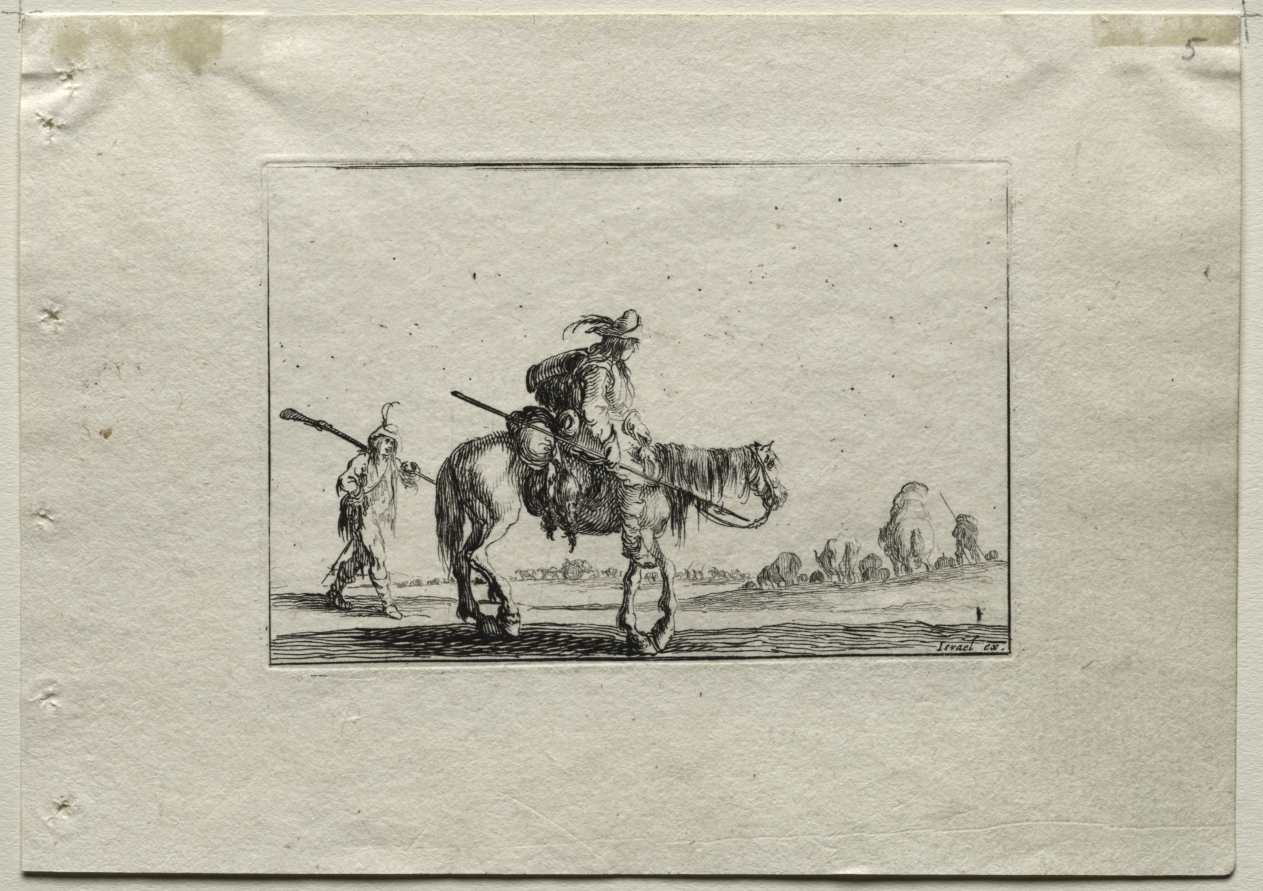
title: Caprices: Mounted Soldier and Foot Soldier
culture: Italy, 17th century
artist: Stefano Della Bella (Italian, 1610–1664)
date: c. 1642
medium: etching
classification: Print